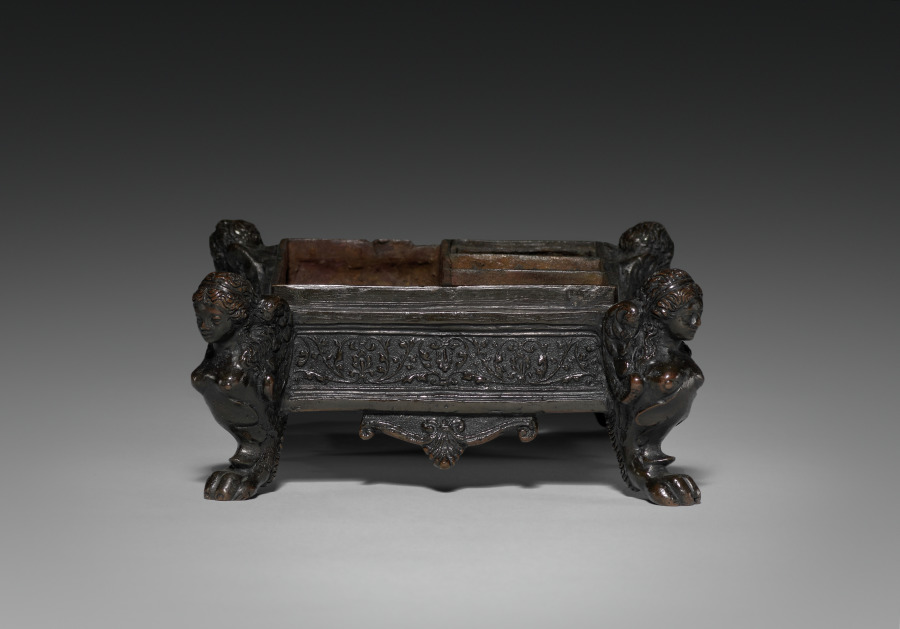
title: Writing Casket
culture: Italy, Ravenna, 16th century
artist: workshop of Severo da Ravenna (Italian, c.1496–c.1543)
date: c. 1525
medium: bronze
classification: Sculpture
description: The interior is divided into four compartments for storing writing implements and sand for blotting.